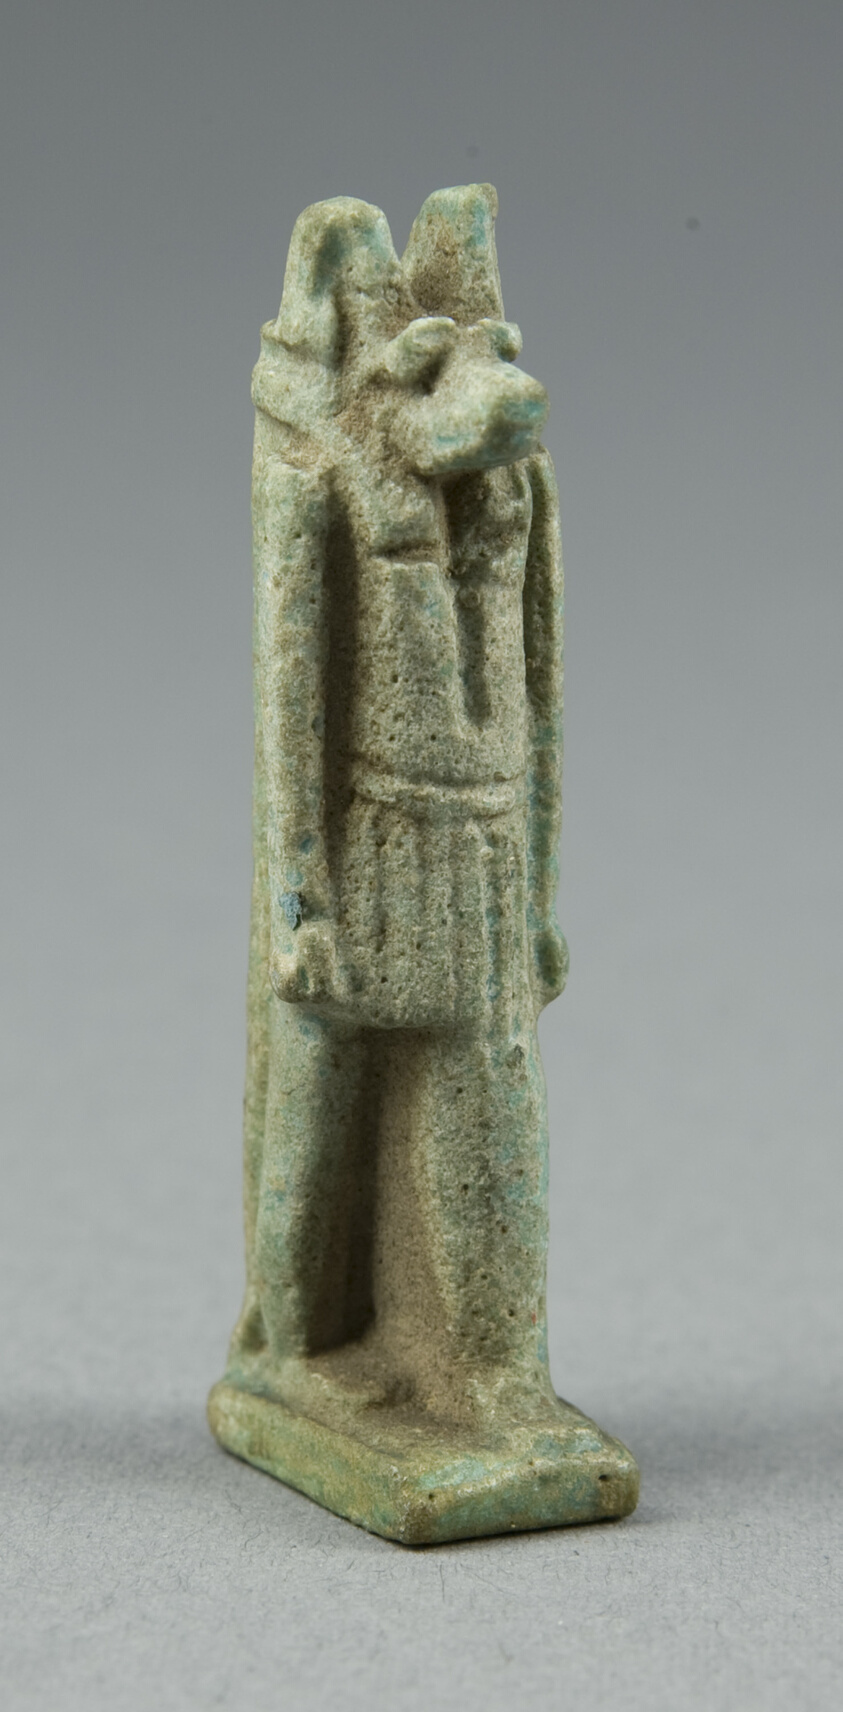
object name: Costume and Accessories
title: Amulet of the God Anubis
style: egyptian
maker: Egyptian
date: Late Period, Dynasties 26–31 (664–332 BCE)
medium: Faience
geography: Egypt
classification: amulet; jewelry; ceramics; ancient art; costume; faïence (composite material)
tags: gods (deities)